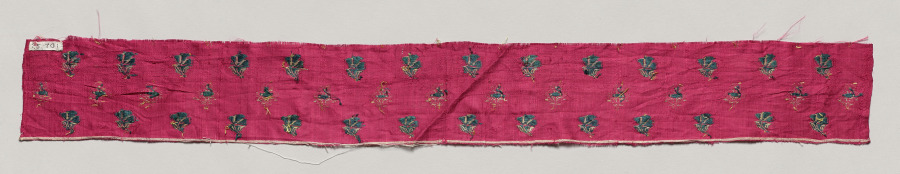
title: Narrow Strip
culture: India, 19th century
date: 1800s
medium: brocade; silk and metal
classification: Textile